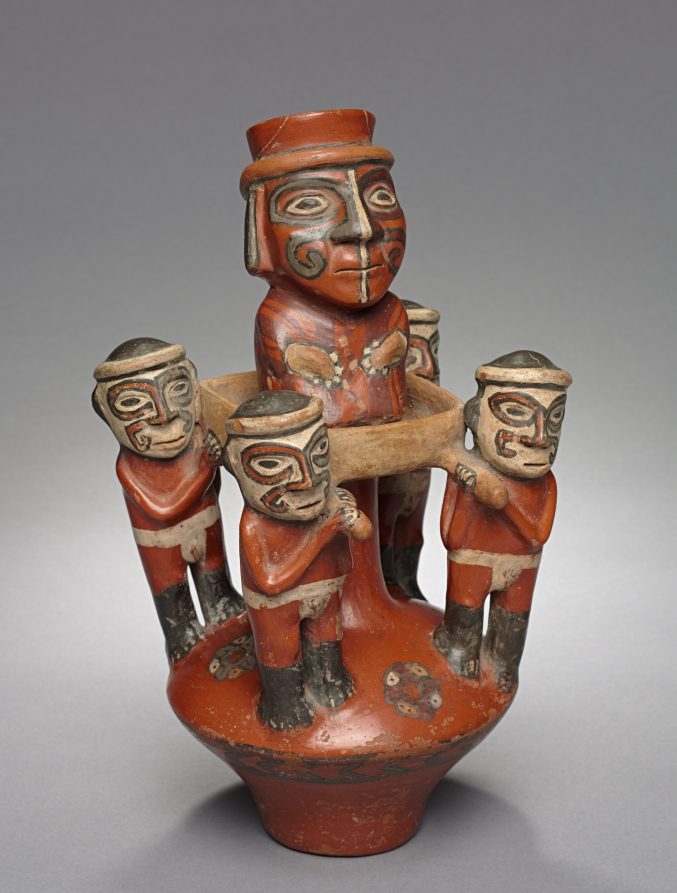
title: Vessel with Litter Group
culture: Central Andes, central highlands, reportedly Wari Wilka, Wari style, 6th-10th century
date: 600–1000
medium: ceramic and slip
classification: Ceramic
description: The sculptural scene atop this vessel's chamber depicts four porters who carry a dignitary in a litter, a high-status mode of transport. Reportedly found at Wari Wilka, a highland water shrine, the vessel empties via a long channel that passes through the body of the dignitary.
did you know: Litters were a mode of transportation reserved for people of high social status.